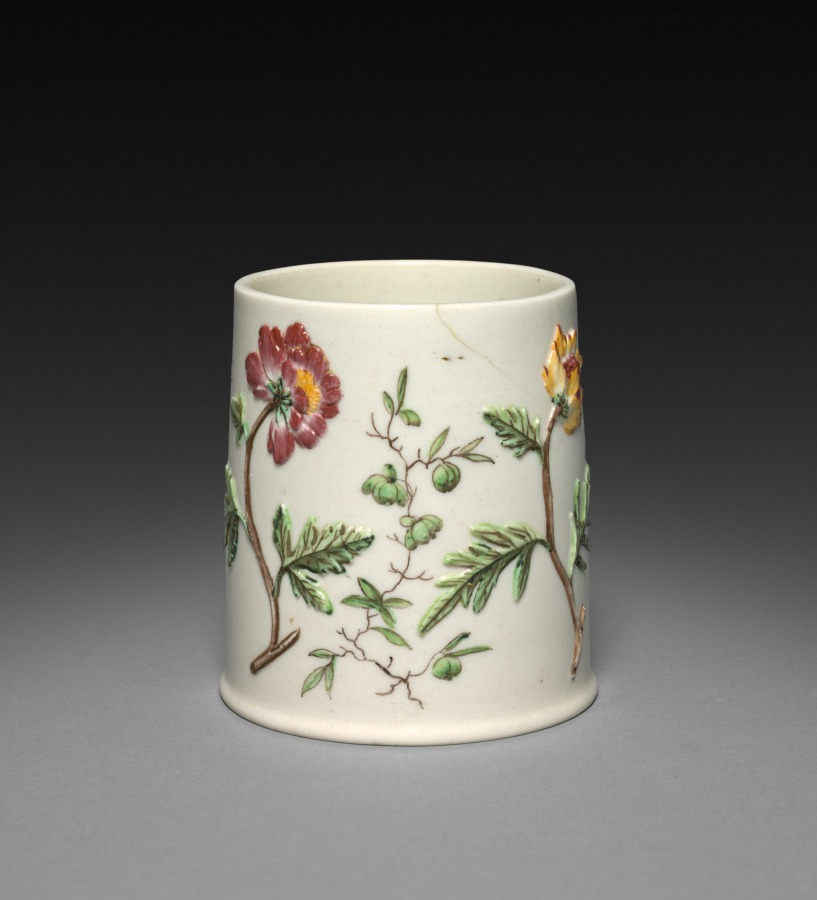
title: Beaker-Shaped Vessel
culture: Italy, Naples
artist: Capo di Monte Factory (Italian)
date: c. 1745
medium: porcelain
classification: Ceramic